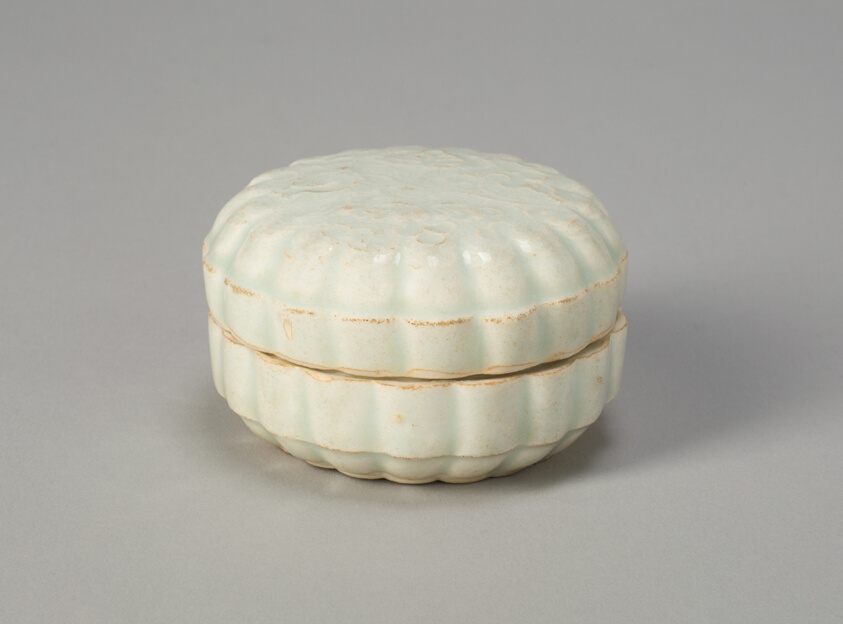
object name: Vessel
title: Covered Foliate Box with Stylized Flowers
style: Chinese (culture or style)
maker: China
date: Southern Song dynasty (1127–1279), 12th/13th century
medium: Qingbai ware; porcelain with underglaze mold-impressed decoration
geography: China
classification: porcelain; ceramics; asian art; vessel